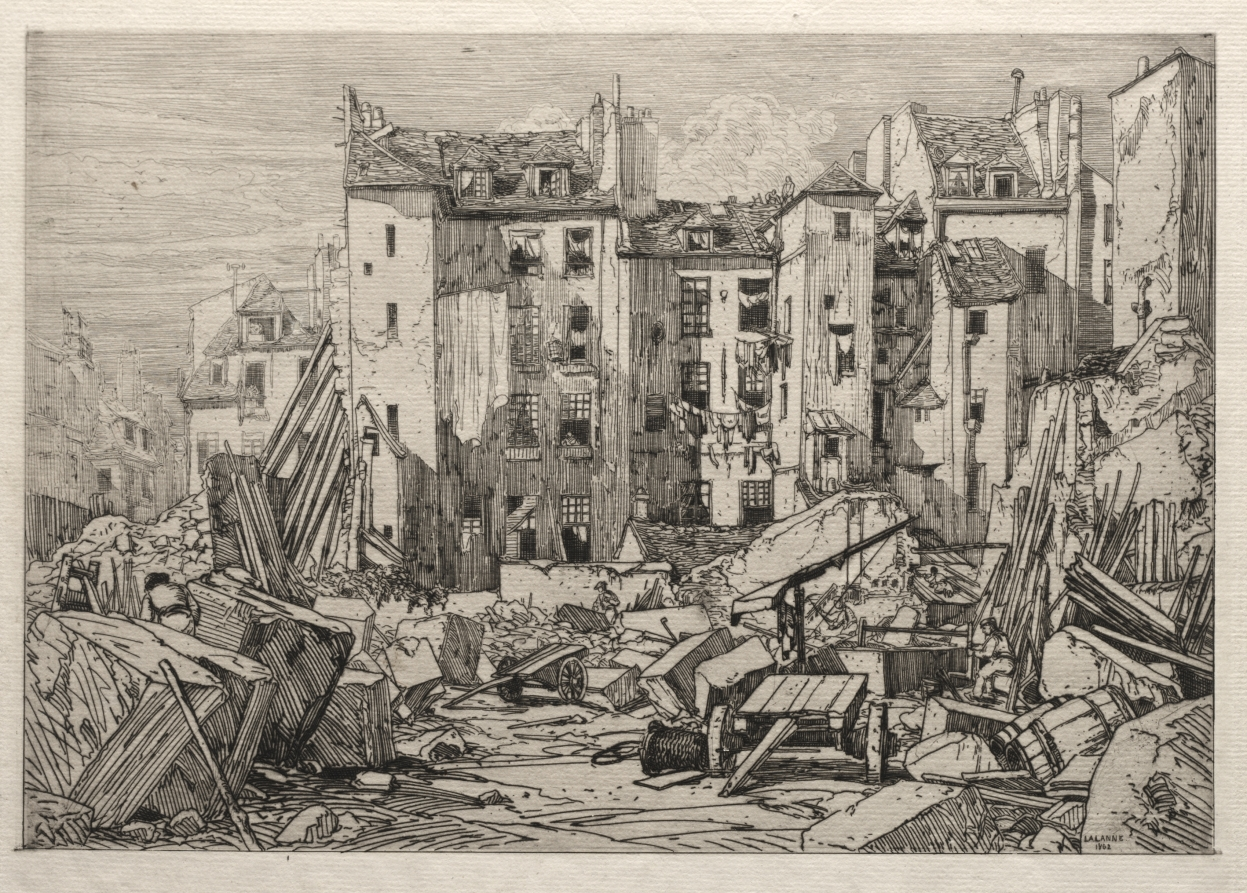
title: Demolition of Old Houses in Paris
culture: France, 19th century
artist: Maxime Lalanne (French, 1827–1886)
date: 1862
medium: etching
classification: Print